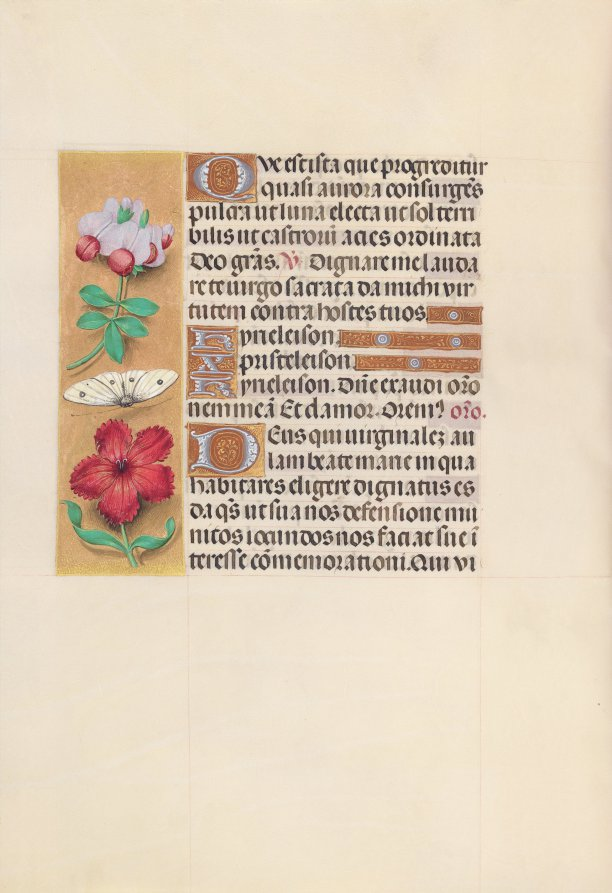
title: Hours of Queen Isabella the Catholic, Queen of Spain: Fol. 129v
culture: Flanders, Ghent and Bruges, late 15th century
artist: Master of the First Prayerbook of Maximillian (Flemish, c. 1444–1519)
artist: and Associates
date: c. 1500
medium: ink, tempera, and gold on vellum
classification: Bound Volume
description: This manuscript was illuminated by a circle of at least five highly organized manuscript painters active in the Flemish cities of Ghent and Bruges. The principal illuminator was Alexander Bening, who painted the majority of the book's miniatures. Manuscripts produced by this circle of artists are renowned for the decoration of their borders, which typically feature a rich variety of realistically-painted flowers, birds, and butterflies. This prayer book, called a book of hours, was intended not for a cleric, but for the private devotions of a lay person-in this case, Isabella the Catholic, Queen of Spain (1451-1504). Isabella's coat of arms embellishes the book's frontispiece. It is unlikely that the book was commissioned by the Queen herself; rather, she probably received it as a diplomatic gift from someone courting her patronage, perhaps Cardinal Francisco Jimenez de Cisneros. A Franciscan friar, Jimenez was dependent upon Isabella for his advancement, first to the post of Queen's confessor in 1492, and then to Archbishop of Toledo in 1495.